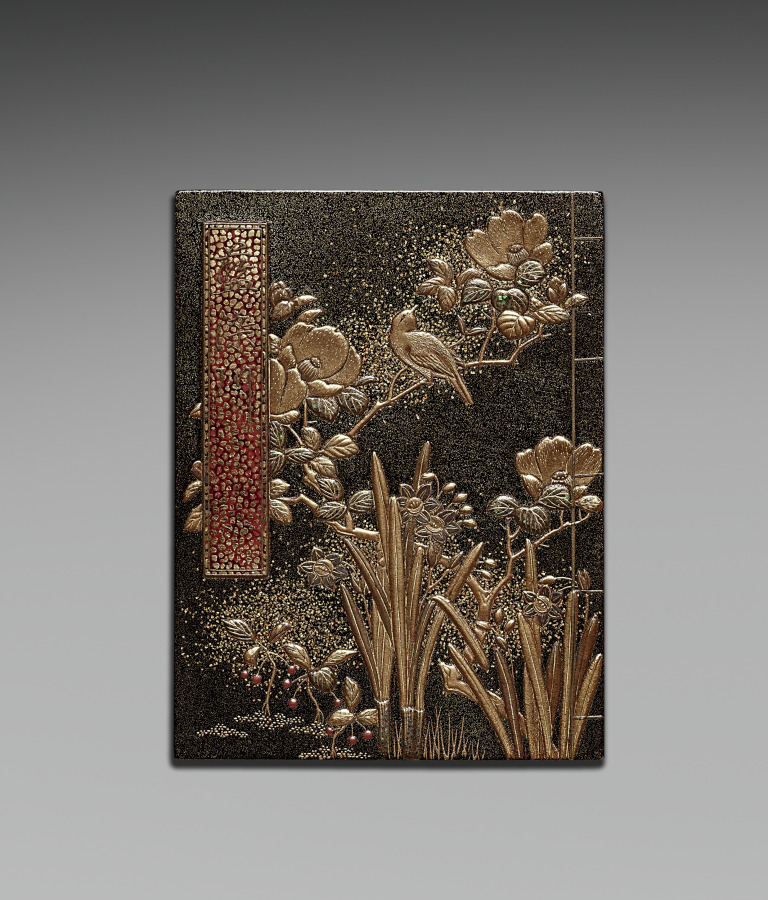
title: Nested Boxes with Chrysanthemum (inner box lid)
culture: Japan, Meiji period (1868–1912)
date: early 1900s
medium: lacquer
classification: Lacquer